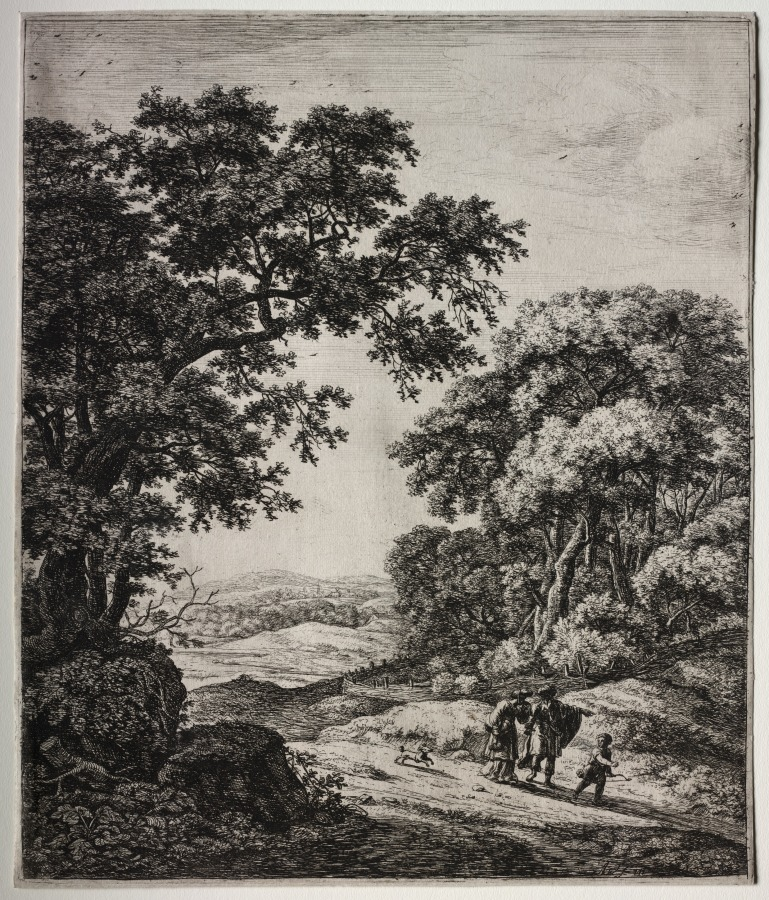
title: Six large upright landscapes with scenes from the Old Testament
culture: Netherlands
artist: Anthonie Waterloo (Dutch, 1609/10–1690)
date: 1640–90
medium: etching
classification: Print